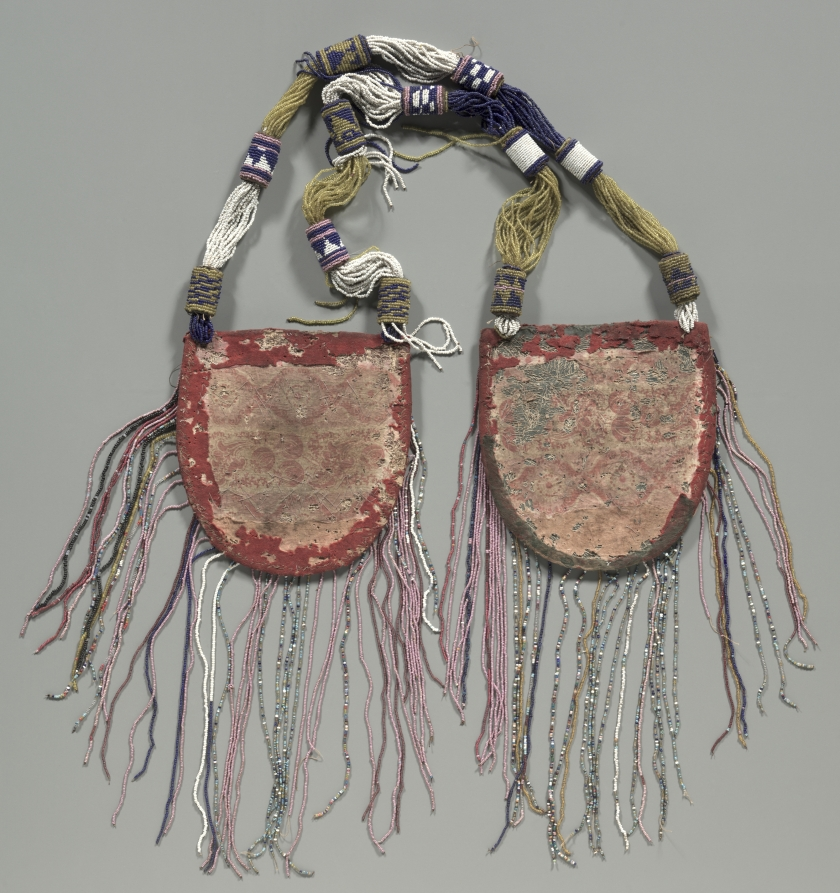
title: Ifá diviner's necklace (òdìgbà Ifá)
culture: Africa, West Africa, Nigeria, Yorùbá-style maker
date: 1900s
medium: Cloth, glass beads, cardboard, cotton, probably wool, and wood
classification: Implements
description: The use of colorful glass beads adds luster to the divination session and underlines the high status diviners enjoy in Yorùbá society. Like kings, diviners derive their authority from the otherworld, òrún. A beaded necklace with two beaded pouches is an accessory carried by the itinerant Yorùbá diviner. Substances sewn into the miniature bags protect the diviner and ensure his power.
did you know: Look closely at the minuscule beads used to make the complex patterns of this multicolored necklace containing two pouches with thin strands that are connected by rope-like cords. A Yoruba diviner would have communicated with the spirit world while wearing this accessory.